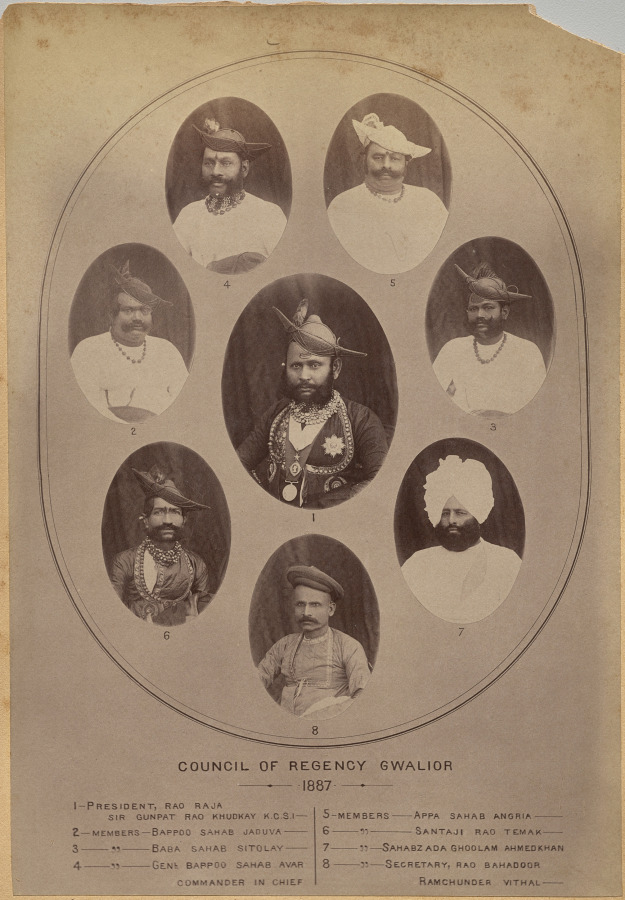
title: Council of Regency, Gwalior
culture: India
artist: Raja Deen Dayal (Indian, 1844–1905)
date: c. 1882–87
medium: albumen print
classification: Photograph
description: These photographs are part of an album, now disassembled, of around 105 photographs taken in India between 1885 and summer 1887 that provide glimpses into the lives of the British colonial elite and royal and upper-class Indians. The museum holds another group of 37 pictures from this album (2016.266), which was probably commissioned by a British civil servant visiting or working in India around 1888 as a personal souvenir of his experiences there.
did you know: Raja Deen Dayal is regarded now, and was considered during his lifetime, to be India’s most important 19th-century photographer.